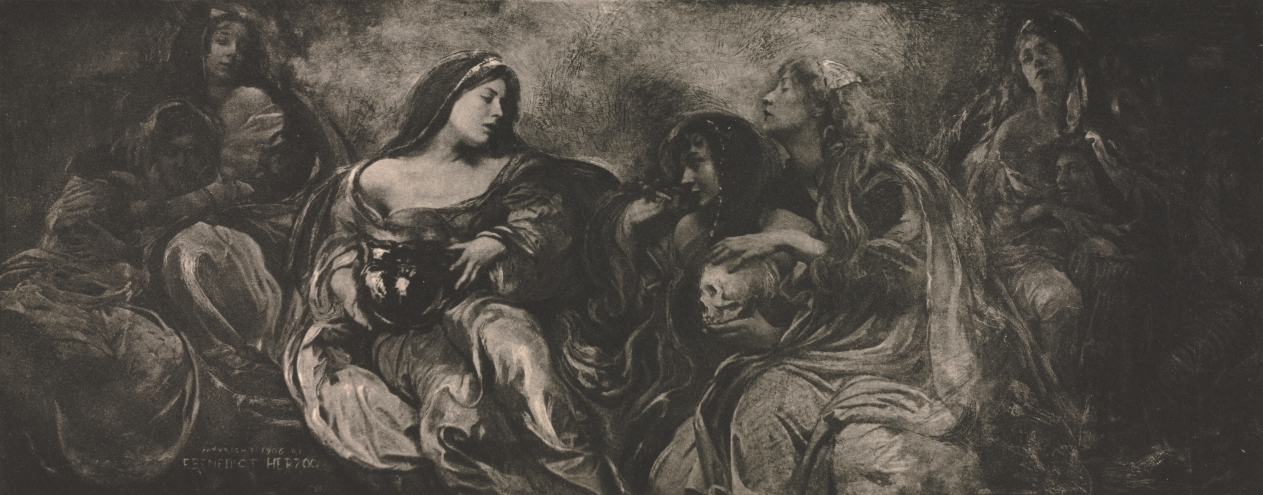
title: Camera Work: 'Twixt the Cup and the Lip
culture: America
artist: F. Benedict Herzog (American, c. 1859–1912)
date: 1907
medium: photogravure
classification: Bound Volume